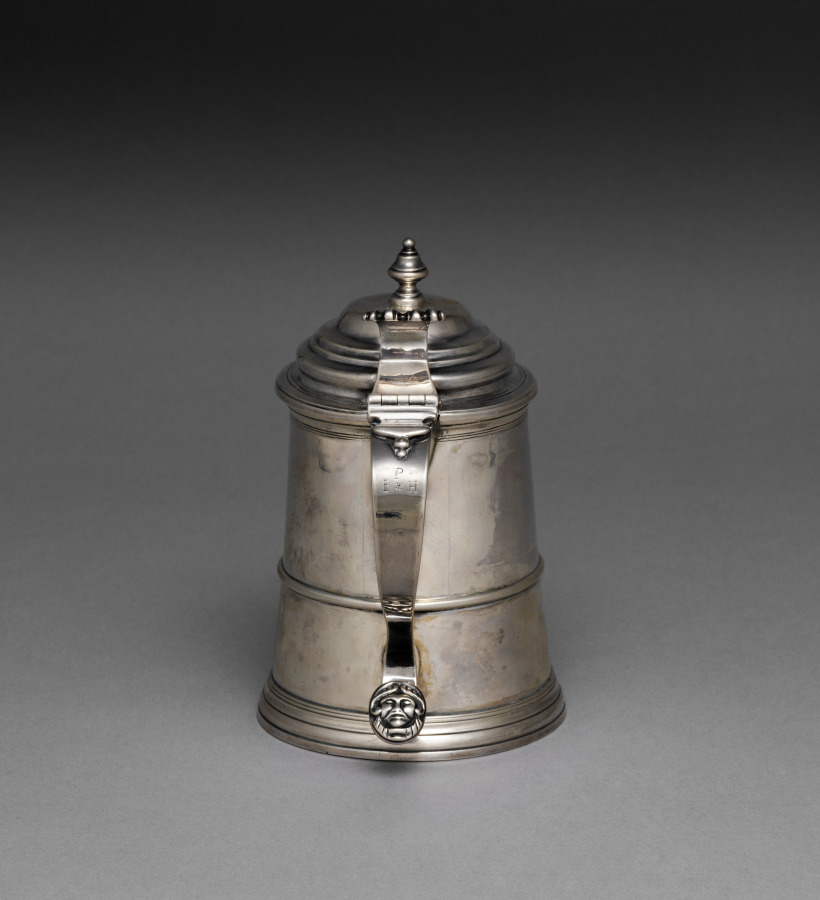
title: Tankard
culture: America, Massachusetts, Boston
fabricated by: John Coverly (American, 1800)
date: c. 1760–80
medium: silver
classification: Silver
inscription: Engraved on handle: "P" over "I * H".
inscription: Stamped on lid: "Coverly"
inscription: Stamped underside: "I.COVERLY".